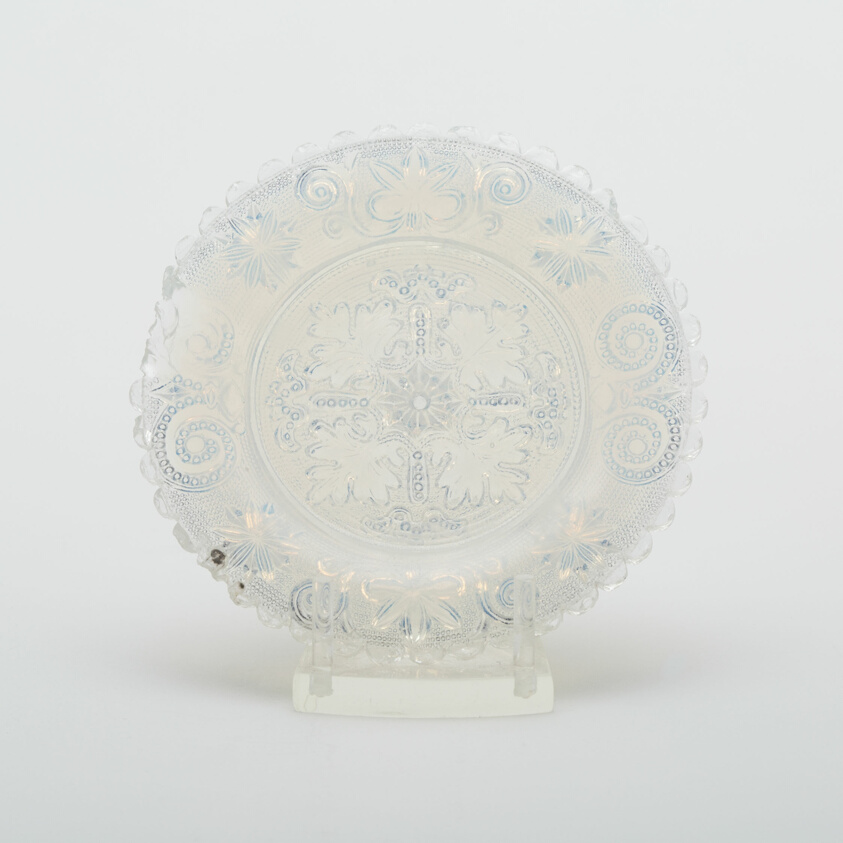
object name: Glass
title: Cup plate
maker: Artist unknown (American, 19th century); Sandwich, Massachusetts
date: 1800–50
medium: Pressed glass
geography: Sandwich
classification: plate (general, dish); glass; american decorative arts; american arts; decorative arts